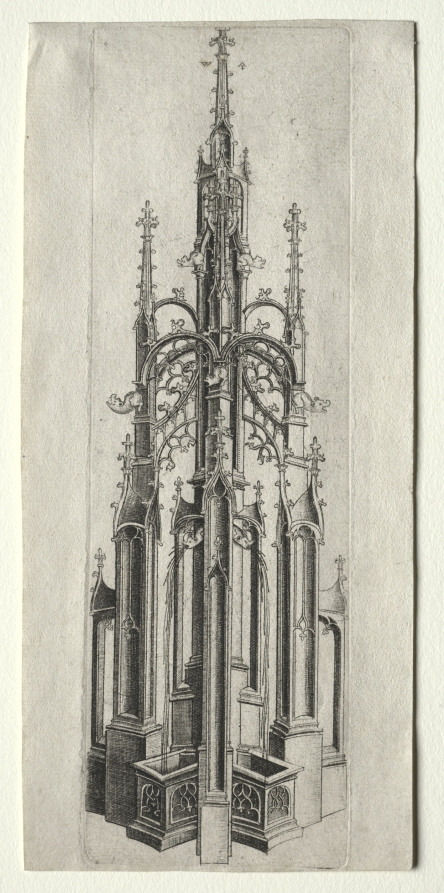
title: Design for a Gothic Fountain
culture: Flanders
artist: Master W with the Key (Netherlandish, active about 1465–1490)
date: c. 1470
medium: engraving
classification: Print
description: Many early engravers used the medium to create motifs for craftsmen. The design for this Gothic fountain calls for the work to be executed in gold or silver and for scented water to spout from the gargoyle heads into the square, carved basins below. Like the great majority of prints by Master W with a Key, this sheet illustrating a design for a fountain is very rare, and only a few impressions are known. Offset on the verso is the faint image of a ship, a subject that inspired eight other engravings.